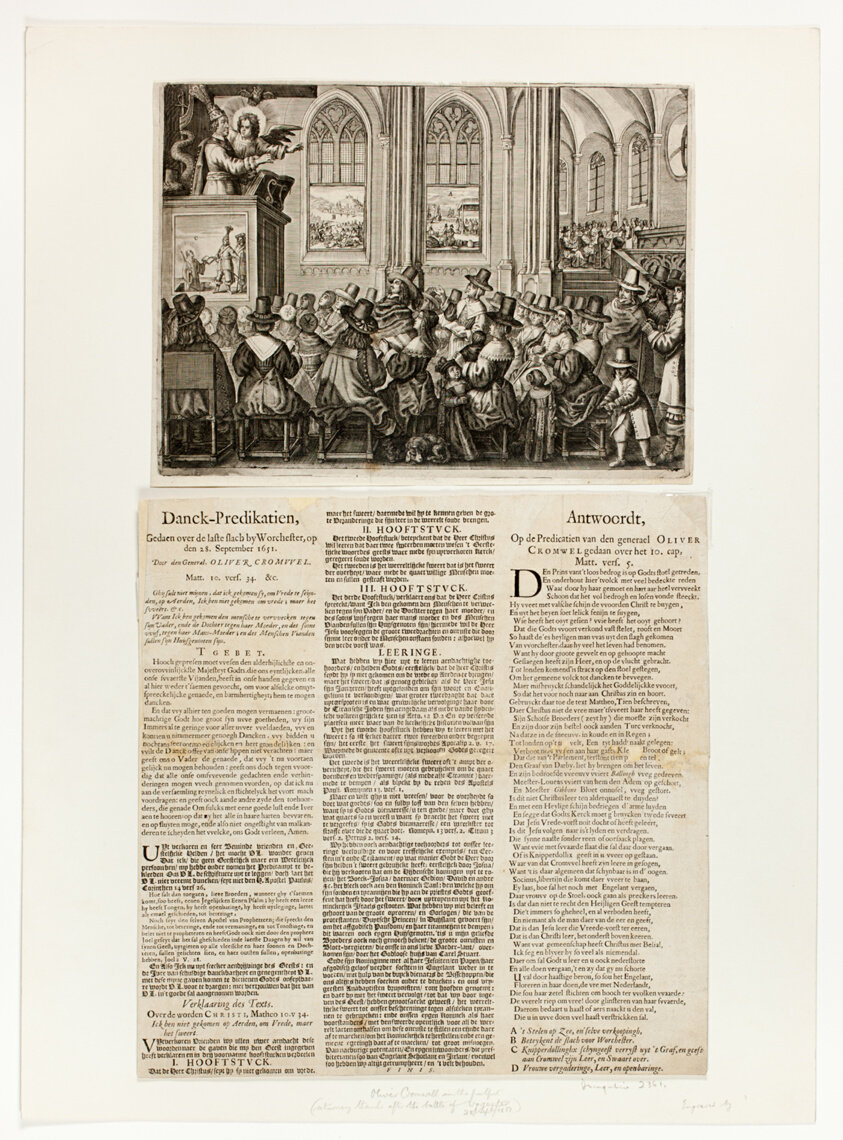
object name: Print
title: Danck-Predikatien, Gedaen over de laste slach by Worcheseter, op den 18 September 1651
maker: Unknown Artist; Dutch, 17th century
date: 1651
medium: Engraving in black on ivory laid paper and letterpress in black on ivory laid paper, laid down on cream wove card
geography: Netherlands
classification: engraving; paper; print; prints and drawing